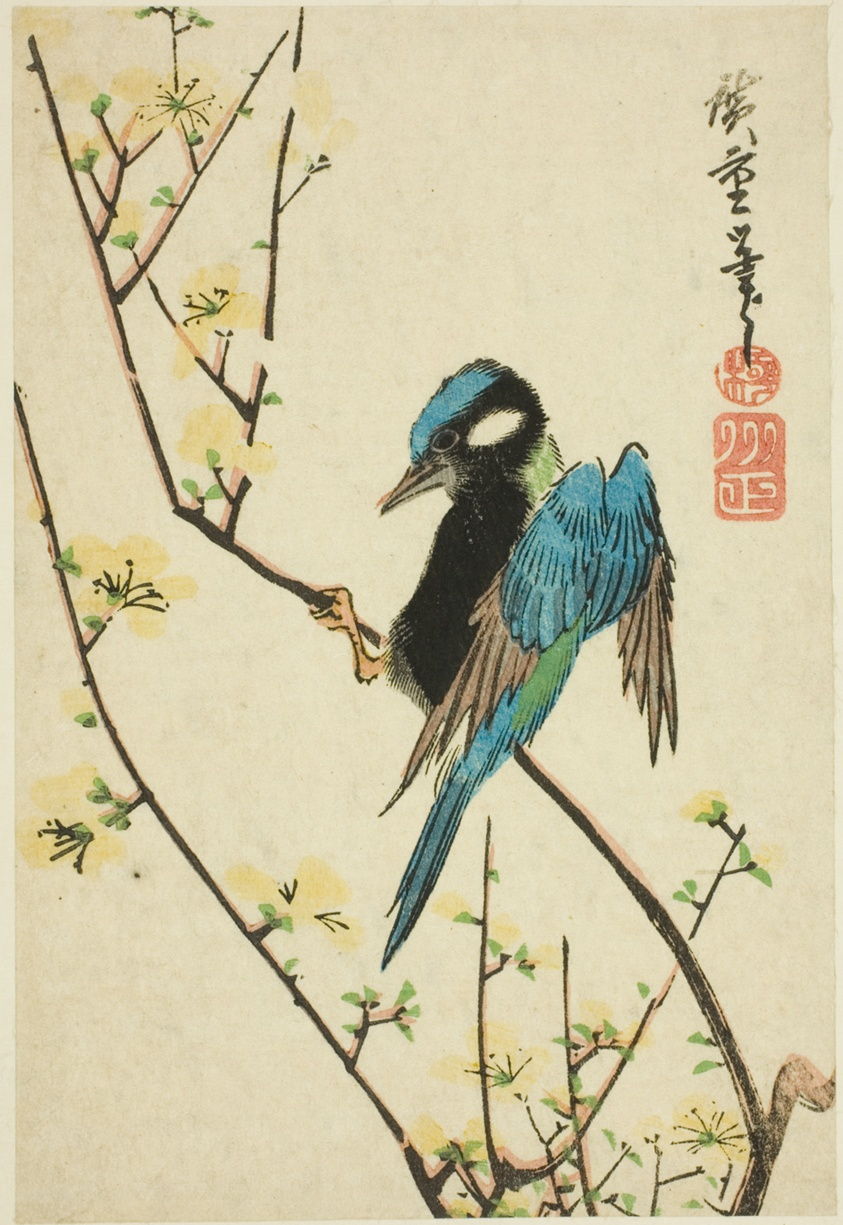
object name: Print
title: Java sparrow on cherry branch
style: Japanese (culture or style)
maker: Utagawa Hiroshige 歌川 広重; Japanese, 1797-1858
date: c. 1830/44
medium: Color woodblock print; koban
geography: Japan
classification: woodblock print; print; asian art